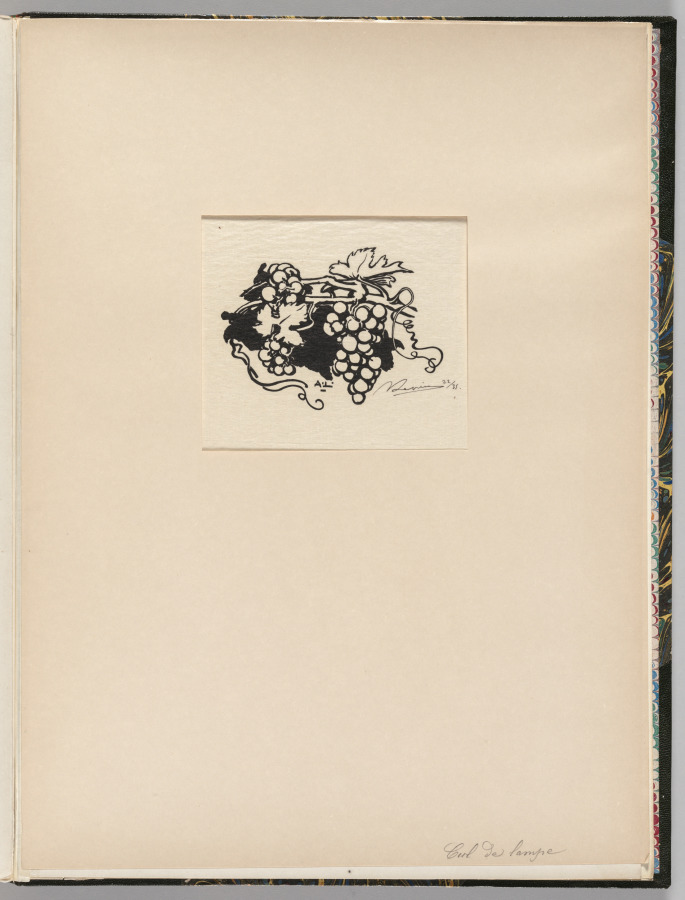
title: Fontainebleau Forest: Tailpiece, Grapes (La Forêt de Fontainebleau: Cul-de-lampe)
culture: France, 19th century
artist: Auguste Louis Lepère (French, 1849–1918)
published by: A. Desmoulins, Published in Revue Illustrée, 1887–90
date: 1890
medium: wood engraving from bound volume of 34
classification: Bound Volume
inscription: On block, lower center: A.L.; below image, lower right, in black ink: ALepère 22/35; on window mat, lower right, in graphite: Cul-de-lampe